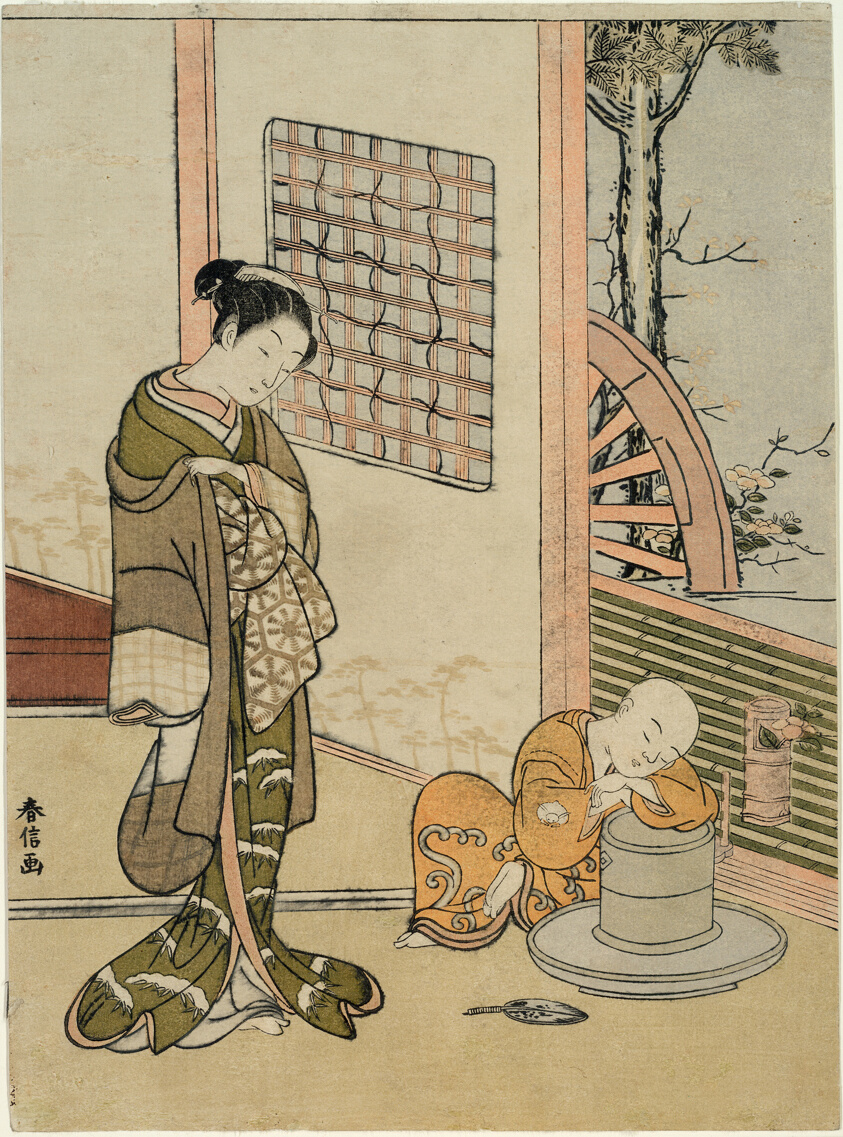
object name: Print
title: The Sleeping Tea-Boy (parody of Hokaso)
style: Japanese (culture or style)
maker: Suzuki Harunobu 鈴木 春信; Japanese, 1725 (?)-1770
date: c. 1767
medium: Color woodblock print; chuban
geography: Japan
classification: woodblock print; print; asian art